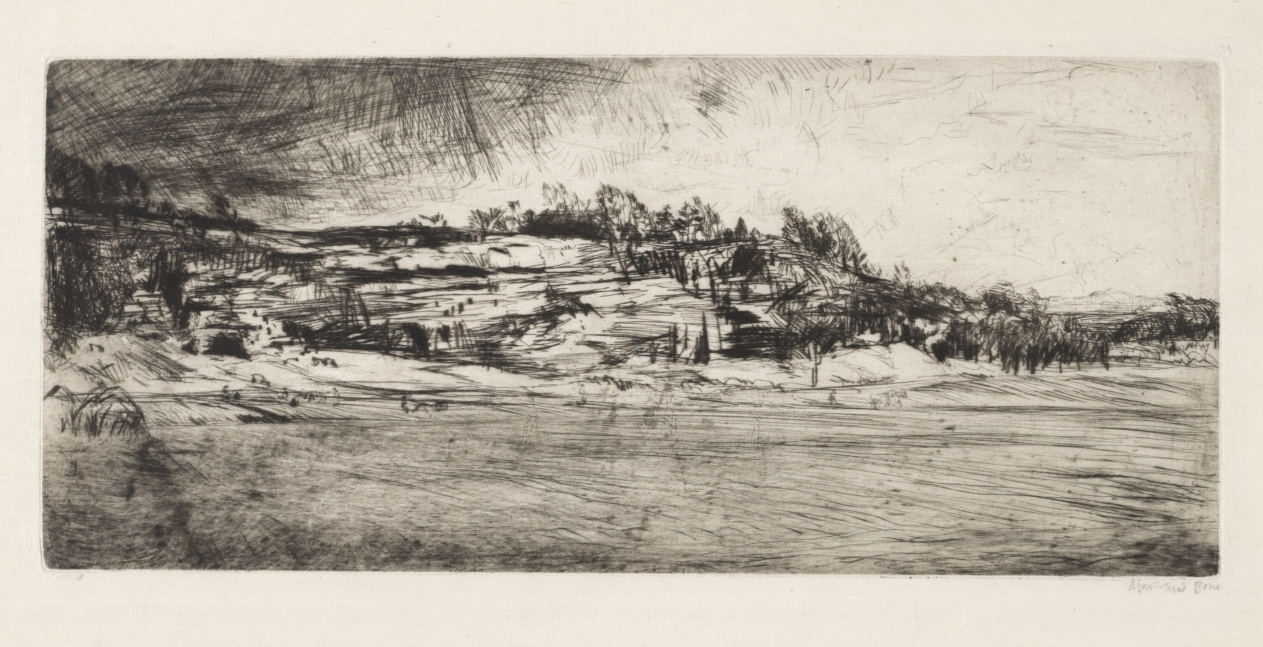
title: Spring at Cardross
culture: England, 20th century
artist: Muirhead Bone (British, 1876–1953)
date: 1900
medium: drypoint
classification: Print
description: A Glasgow artist with architectural training, Bone began to make prints in 1898. One of his earliest drypoints, Spring at Cardross already demonstrates Bone’s brilliant draftsmanship and atmospheric use of plate-tone. In abbreviated strokes, the artist described a panoramic view of the landscape of Dumbartonshire, Scotland.